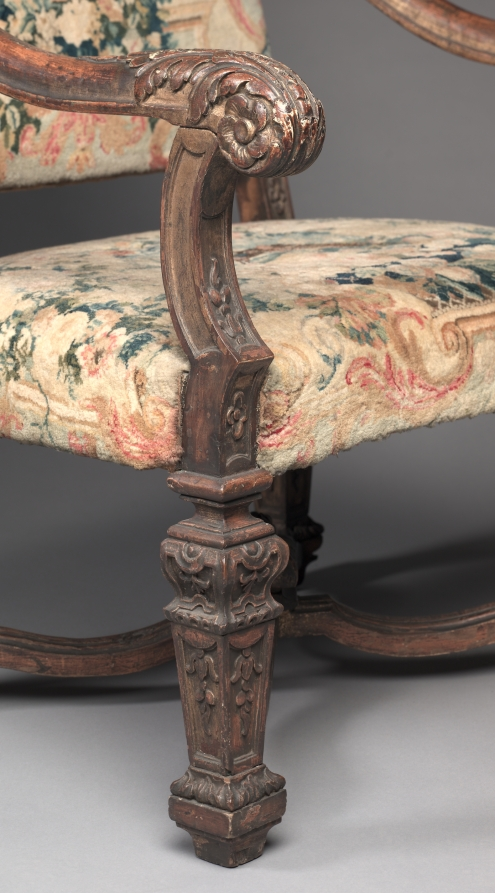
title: Armchair (3 of 4)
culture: France, 18th century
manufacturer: Royal Savonnerie Manufactory, Chaillot Workshops (French, est. 1627)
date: before 1717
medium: carved wood, Savonnerie knotted-pile (symmetrical rug knot) upholstery; wool, hemp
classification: Furniture and woodwork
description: These chairs belong to a suite that includes a settee (also in the CMA’s collection) and a tapestry made for a count and countess to mark their wedding in 1717. Furniture of this scale was usually placed against the wall in grand reception halls, more as a display of wealth than for use. Upholstered in Savonnerie tapestries, this suite was among the most treasured and expensive example anyone could own and typically reserved for royalty. To add decorative and intellectual interest to the textiles, weavers incorporated symbols depicting various stories from the Fables of Jean de La Fontaine, published from 1668 to 1694 and largely adapted from Aesop and other early storytellers.